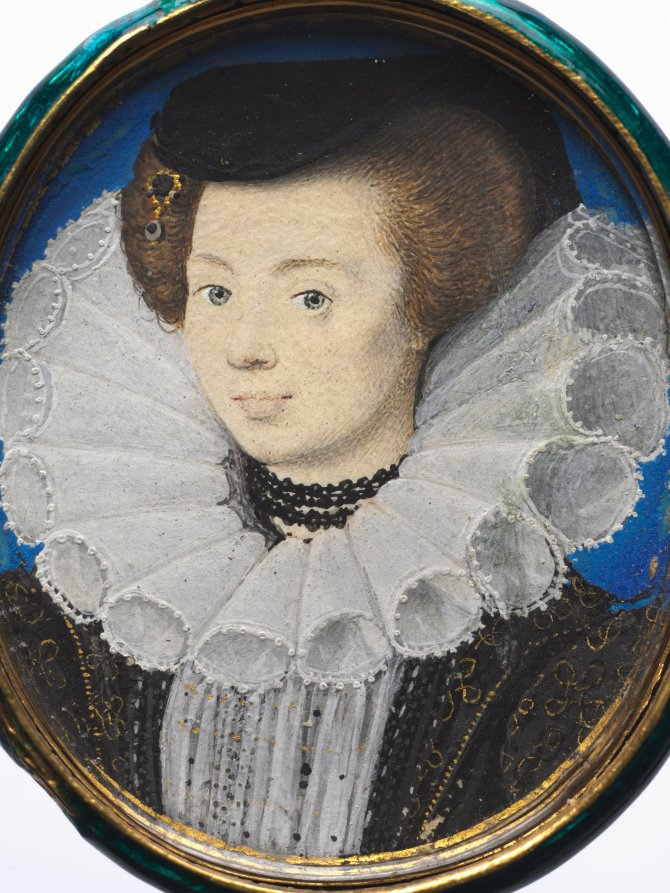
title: Portrait of a Woman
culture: England, 16th century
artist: Nicholas Hilliard (English, c. 1547–1619)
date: c. 1593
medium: watercolor on vellum in a gold and enamel locket frame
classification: Portrait Miniature